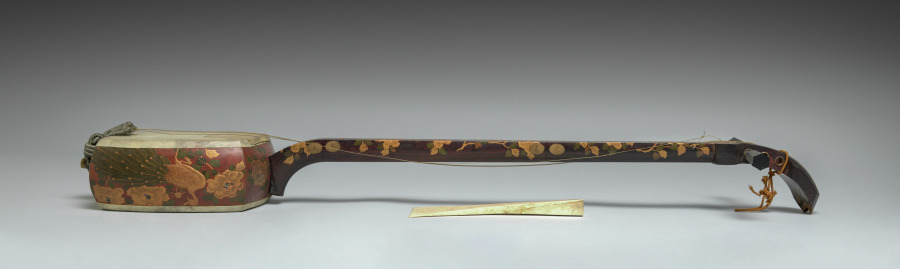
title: Guitar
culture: Japan, Edo period (1615–1868)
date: early to mid-1800s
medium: mixed media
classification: Musical Instrument